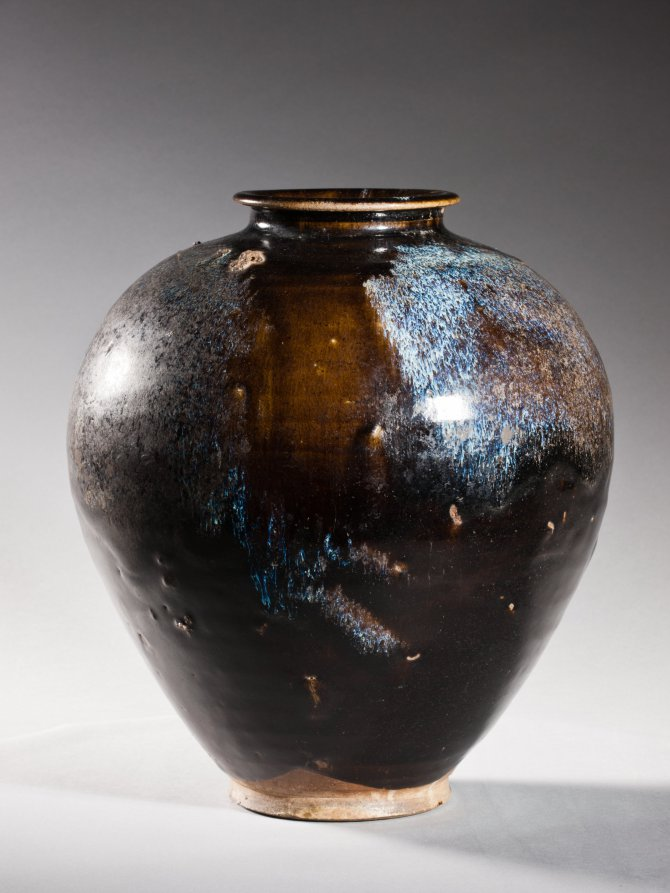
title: Jar: Black Ware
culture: China, Henan province, Huangdao kilns, Tang dynasty (618-907)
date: 700s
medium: glazed stoneware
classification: Ceramic